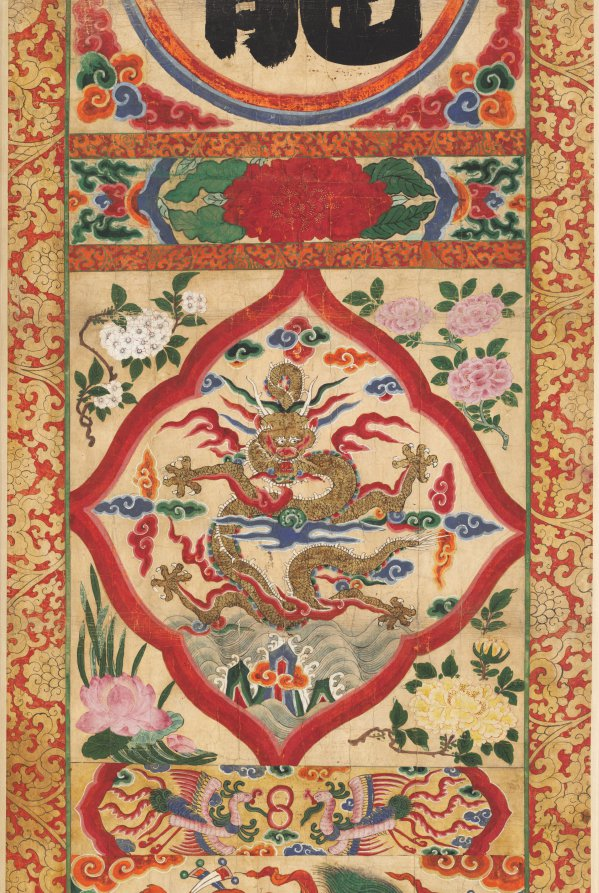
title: Painted Panel of Character "Dragon"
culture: Korea, Joseon dynasty (1392–1910)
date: early 1900s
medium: hanging scroll, ink and color on paper; unmounted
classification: Painting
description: This set of four colorful hanging scrolls may have been used in an outdoor Buddhist ritual to evoke heavenly blessings. Each hanging scroll bears four different characters: tiger, dragon, whistle, and recite. Traditionally, tiger and dragon belong to the four directional guards, respectively west and east.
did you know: This set of four colorful hanging scrolls may have been used in an outdoor Buddhist ritual to evoke heavenly blessings.